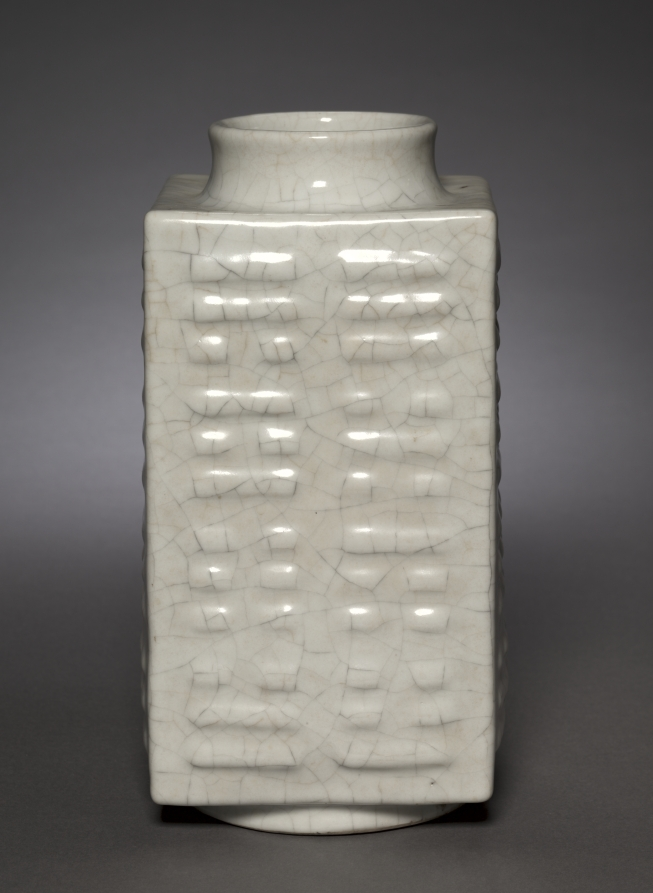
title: Vase with the Eight Trigrams Design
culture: China, Qing dynasty (1644–1911), Qianlong reign (1736–95)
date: 1736–95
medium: porcelain with a crackled Ge-type glaze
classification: Ceramic